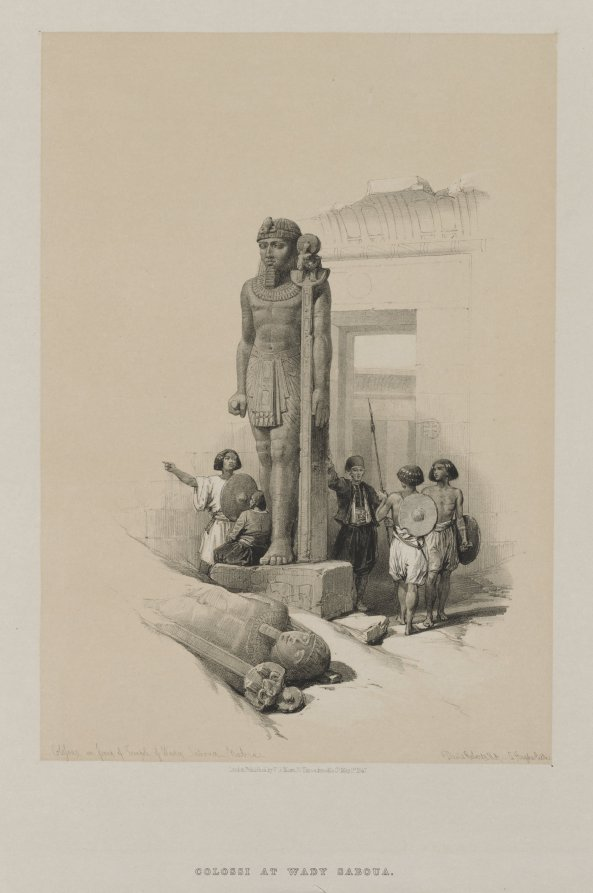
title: Egypt and Nubia, Volume II: Colossus in Front of the Temple at Wady Saboua, Nubia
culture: England, 19th century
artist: Louis Haghe (British, 1806–1885)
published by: F. G. Moon, 20 Threadneedle Street, London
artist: after David Roberts (Scottish, 1796–1864)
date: 1847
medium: color lithograph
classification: Print